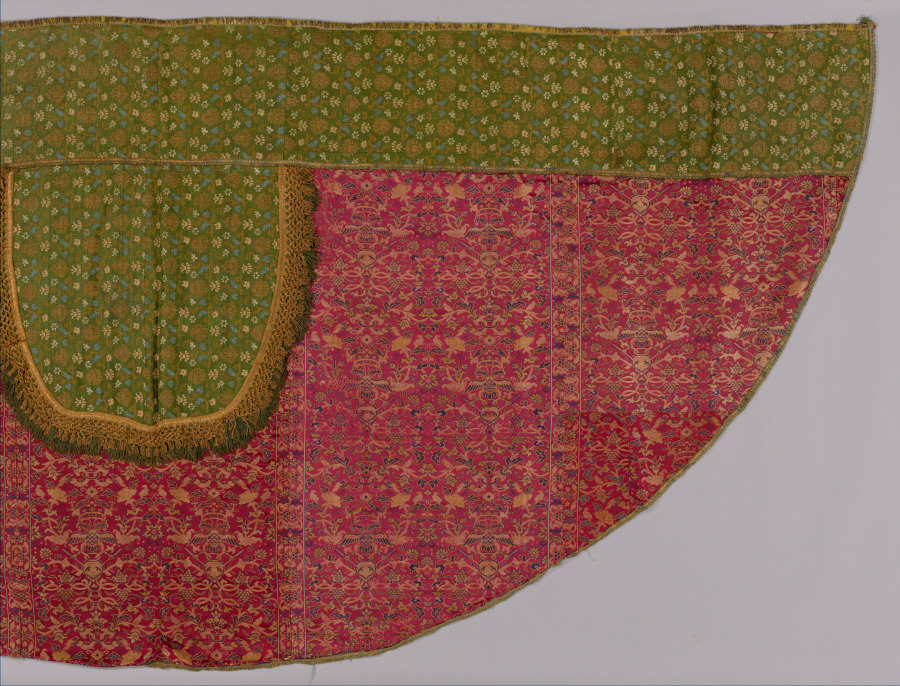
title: Cope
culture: China, Macao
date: 1500s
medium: Silk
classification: Garment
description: Silk fabric woven in China with European motifs was transported by European traders by the early 16th century. This popular pattern features a crowned double-headed eagle grasping arrows in its claws above a vase emitting blossoming vines. The eagle motif was derived from the Habsburg coat of arms, rulers of Spain and Austria during the 1500s and 1600s. Vertical borders with Chinese flora occur near the selvages of the five silk lengths forming the cope. The gilt-metal braided and fringed hood and broad orphrey band, or ornamental border, along the front edges feature fashionable small-scale floral sprigs.